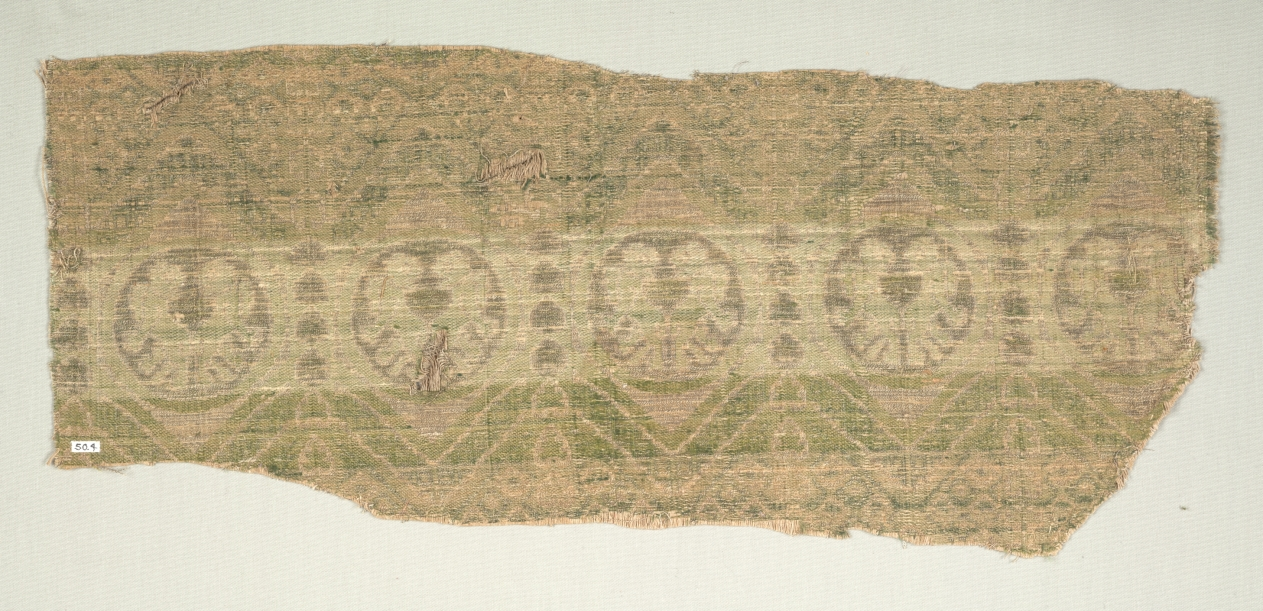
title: Textile Fragment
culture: Spain, Mudejar, 13th century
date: 13th century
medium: compound twill: silk, gold and linen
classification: Textile